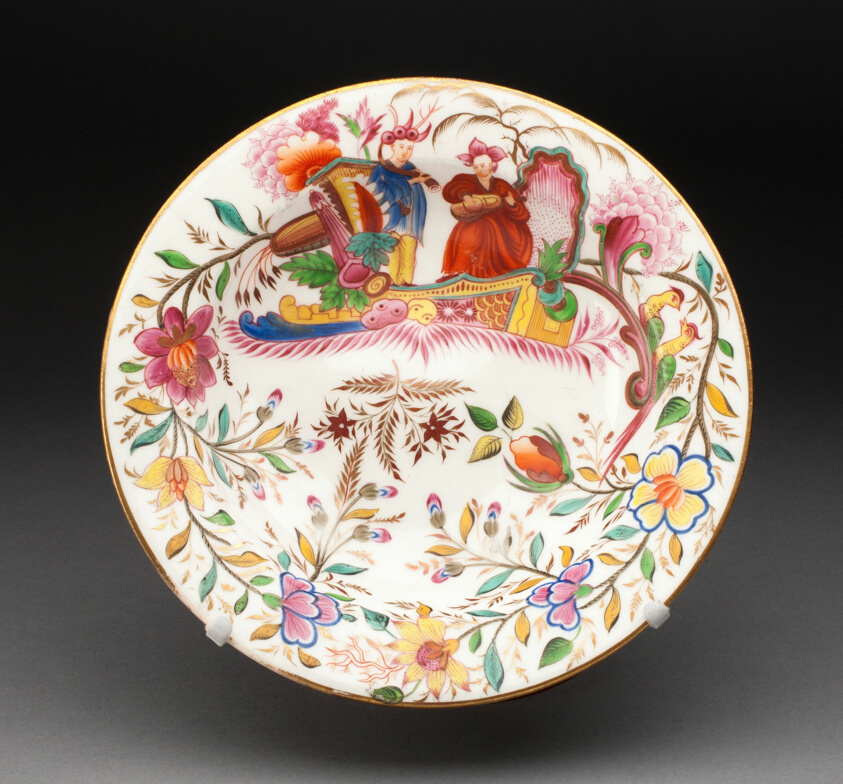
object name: Ceramics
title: Soup Plate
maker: Pinxton Porcelain Factory (English, 1796-1813)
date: c. 1800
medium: Porcelain with polychrome enamel decoration and gilding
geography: Pinxton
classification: plate (general, dish); tableware; dish (vessel); porcelain; european decorative arts; ceramics